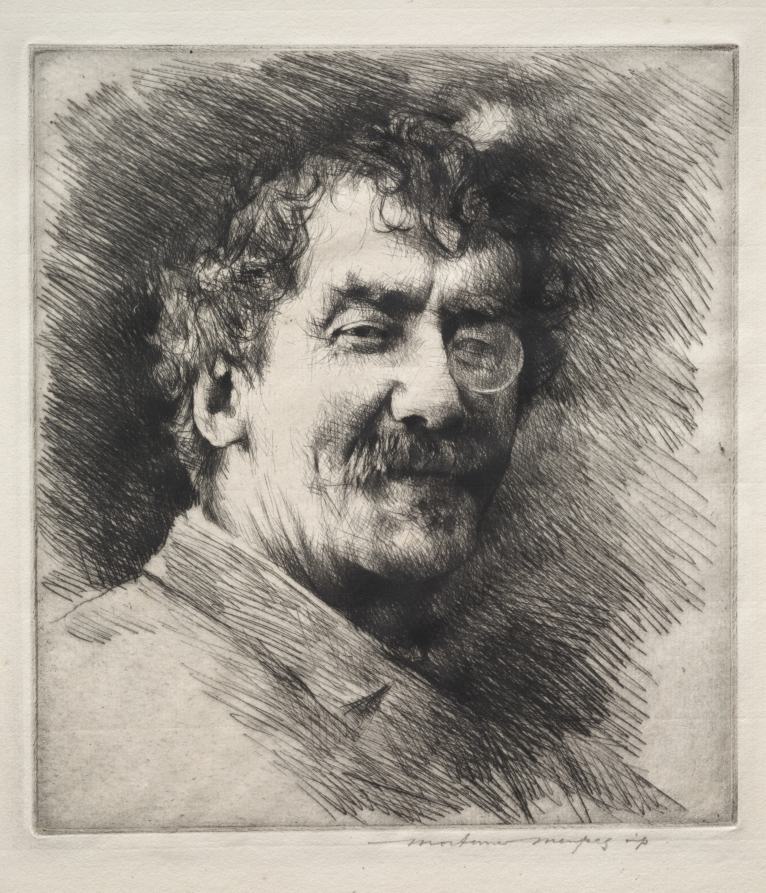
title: James MacNeill Whistler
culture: England, 19th century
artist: Mortimer Menpes (British, 1860–1938)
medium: drypoint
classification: Print